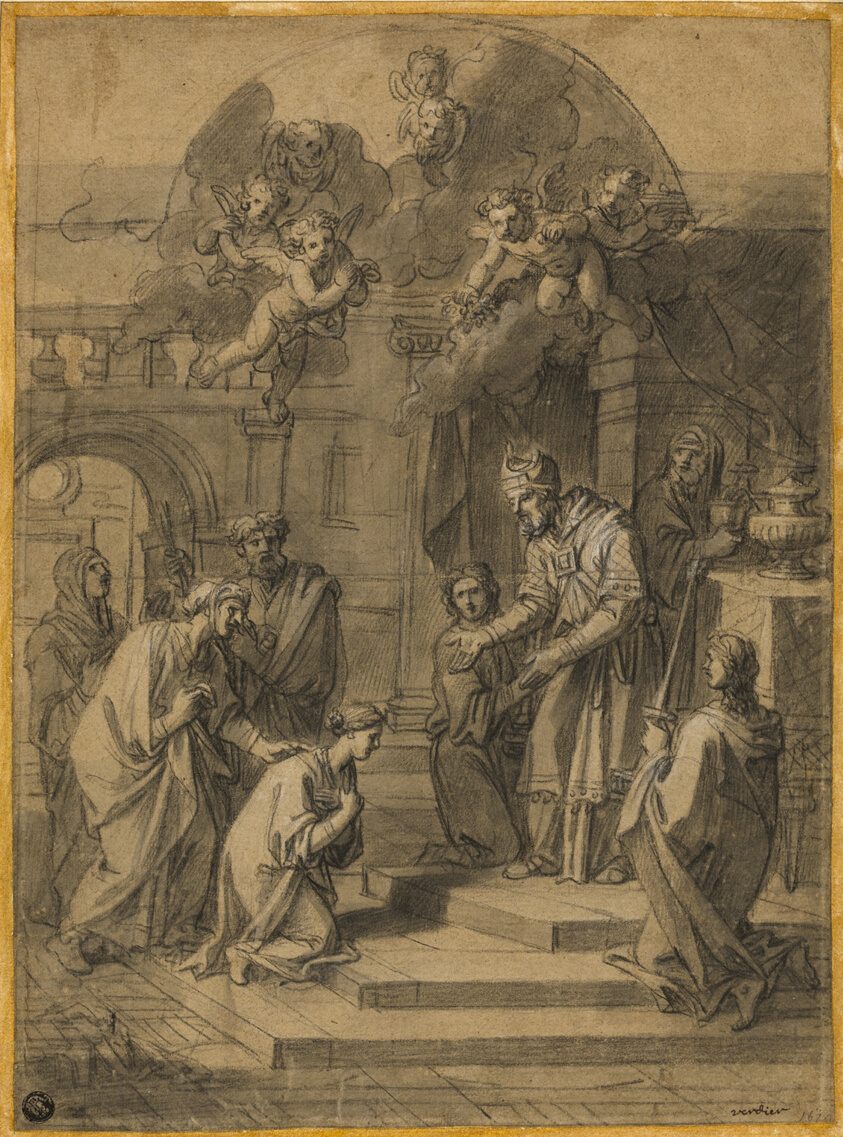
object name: Drawing and Watercolor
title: Presentation of the Virgin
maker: François Verdier (French, 1651-1730)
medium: Black crayon and brush and gray wash, with black chalk, heightened with white chalk, on brown laid paper, laid down on cream laid paper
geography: France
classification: charcoal; drawings (visual works); prints and drawing